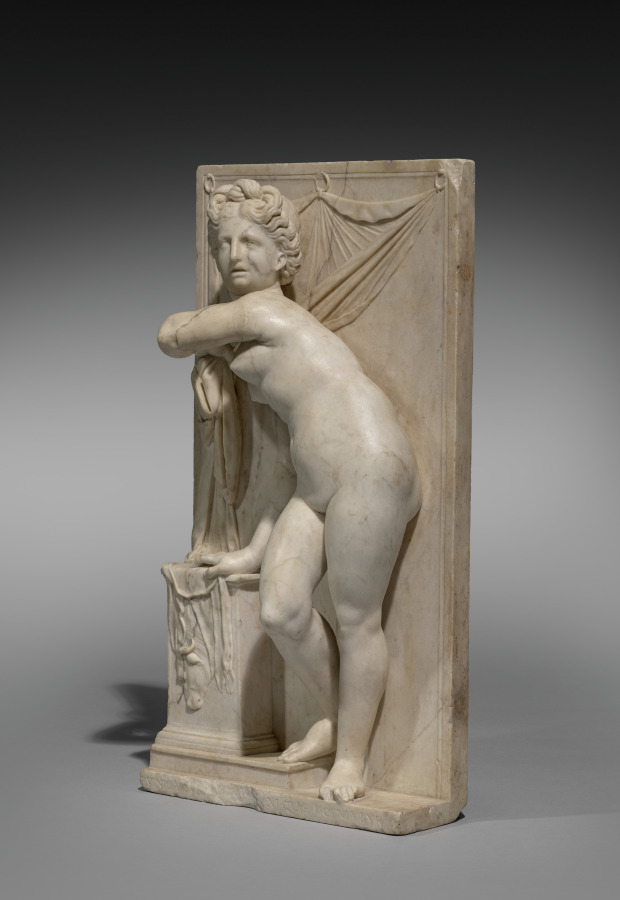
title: Dido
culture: Italy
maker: Aurelio Lombardo (Italian, 1501–1563)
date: c. 1525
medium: marble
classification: Sculpture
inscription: PVNICA SVM [DIDO ERE]XI QVAE MOENIA BYRSA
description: Artists customarily portrayed Dido as a forlorn lover abandoned by the Trojan hero, Aeneas, but here she is a conquering queen. Dido draws aside an oxhide curtain, a reference to the mythical founding of Carthage (in modern-day Tunisia, North Africa), when she was given an oxhide to demarcate granted land. By cutting it into thin strips she was able to encircle the future city. Dido was likely created for display in a studiolo, a place of study featuring refined works of art appreciated by humanist scholars and aficionados during the Renaissance.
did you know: Dido’s nudity and hairstyle are allusions to ancient Greek images of Aphrodite.